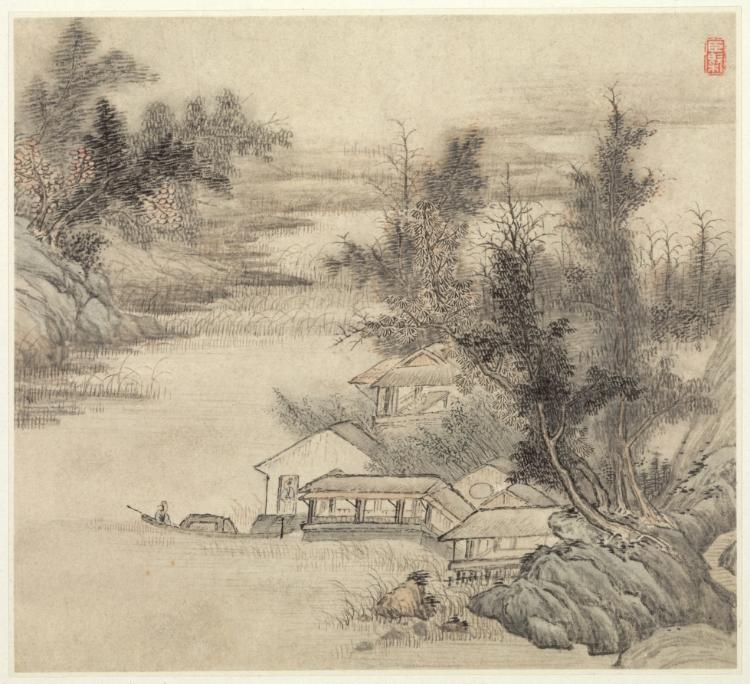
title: Album of Landscapes: Leaf 2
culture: China, Qing dynasty (1644-1911)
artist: Wang Gai (Chinese, active c. 1677–1705)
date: 1677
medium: album leaf, ink and light color on paper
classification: Painting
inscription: Poem by Wang Shih-chen